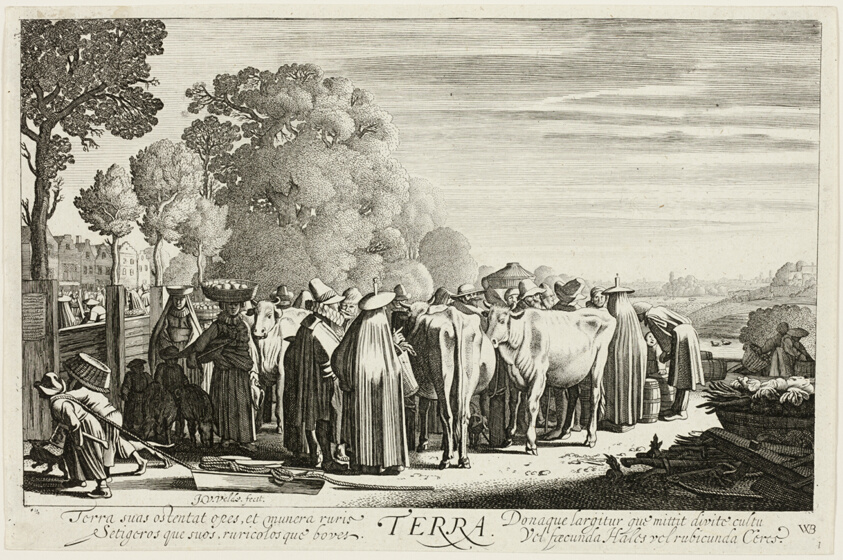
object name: Print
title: Earth, plate one from The Four Elements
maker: Jan van de Velde II (Dutch, c.1593-1641); after Willem Buytewech (Dutch, 1591/92-1624)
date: 1622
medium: Etching and engraving on ivory laid paper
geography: Holland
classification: engraving; print; prints and drawing